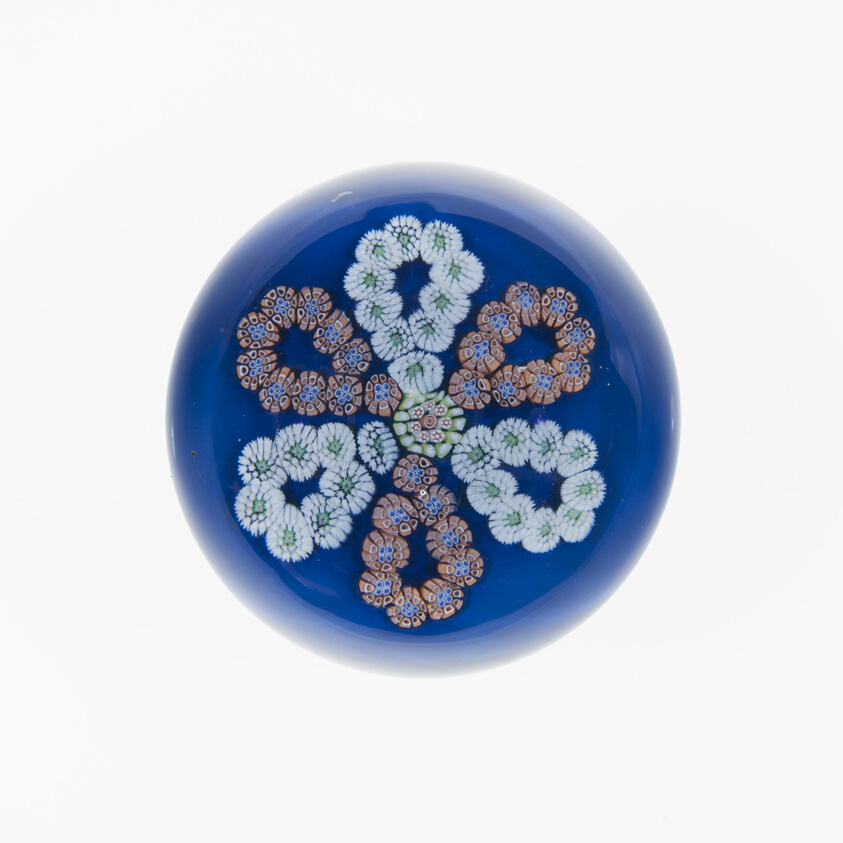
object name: Glass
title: Paperweight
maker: Clichy Glassworks (Cristalleries de Clichy); Clichy, France, 1837-1885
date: 19th century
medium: Glass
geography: Clichy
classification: paperweight; millefiori; european decorative arts; glass